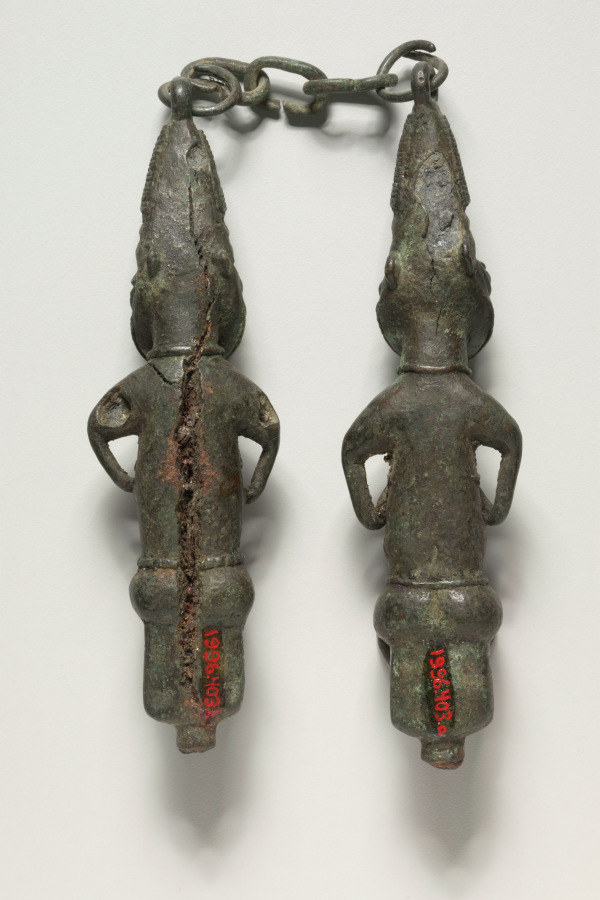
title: Pair of Ritual Staffs (ẹdan Ògbóni)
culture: Africa, West Africa, Nigeria, Yorùbá-style maker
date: possibly 1800s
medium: Copper alloy and iron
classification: Sculpture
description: The chain connecting these two figures allows them to be worn in public by a member of the Ògbóni or Òṣùgbó association as authority emblems. The male on the right gives the association’s typical salute by clasping his left fist on the right one, while the female on the left holds her breasts as a sign of welcome and generosity. The use of copper alloy and iron expresses Ògbóni/Òṣùgbó's concerns with longevity and durability.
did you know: Imagine how this would look when its owner wore it; the chain would go around the back of the neck and the figures would rest on their chest.